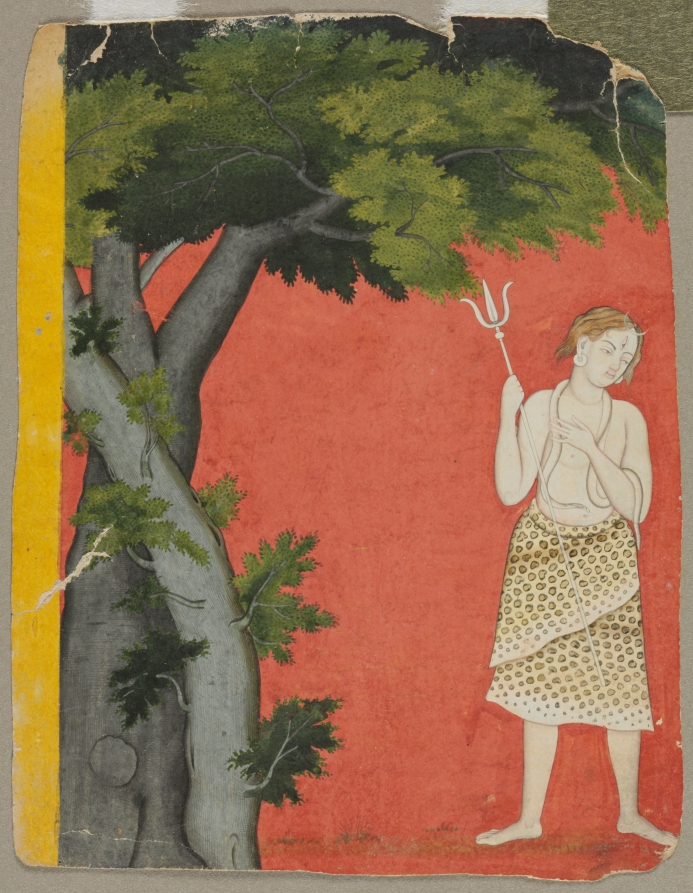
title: Shiva under trees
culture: Northern India, Pahari kingdoms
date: c. 1780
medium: Gum tempera on paper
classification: Painting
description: Cut from a larger composition, this fragment shows the god Shiva who has come down to earth. He seems alluringly approachable despite his white body, the snake around his neck, his third eye, trident weapon, animal-skin garment, and the crescent moon at his brow. Set off against a flat red background, he stands under two shade trees that make his manifestation on earth believable. One tree is entwined around the other, metaphorically suggesting the physical love Shiva seems to wistfully desire.